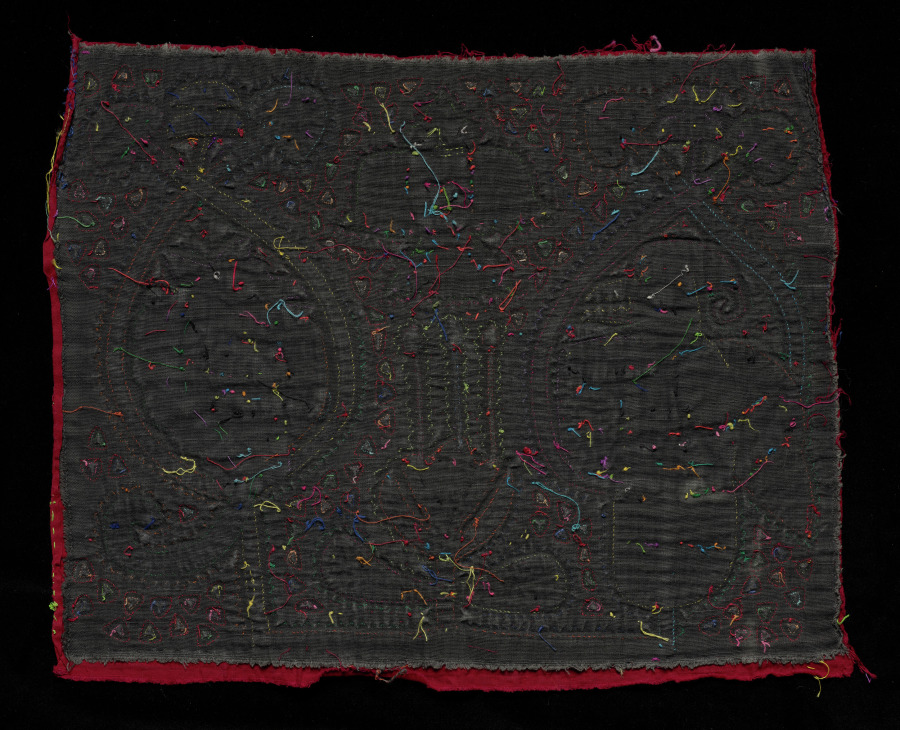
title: Flower, Birds, and Profile Animal Mola Panel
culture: Republic of Panamá, Gunayala Comarca, Guna people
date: 1900s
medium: Cotton; reverse appliqué, appliqué, embroidery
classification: Garment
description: This whimsical, well-made panel was created by a female artist of the Guna, an Indigenous people of the Republic of Panamá. It was one of two identical or similar panels that were stitched into the front or back of a blouse (mola). Such blouses are so distinctive to the Guna that they are the single most recognizable element of Guna cultural identity.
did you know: Such panels originally were sewn into blouses known as molas.